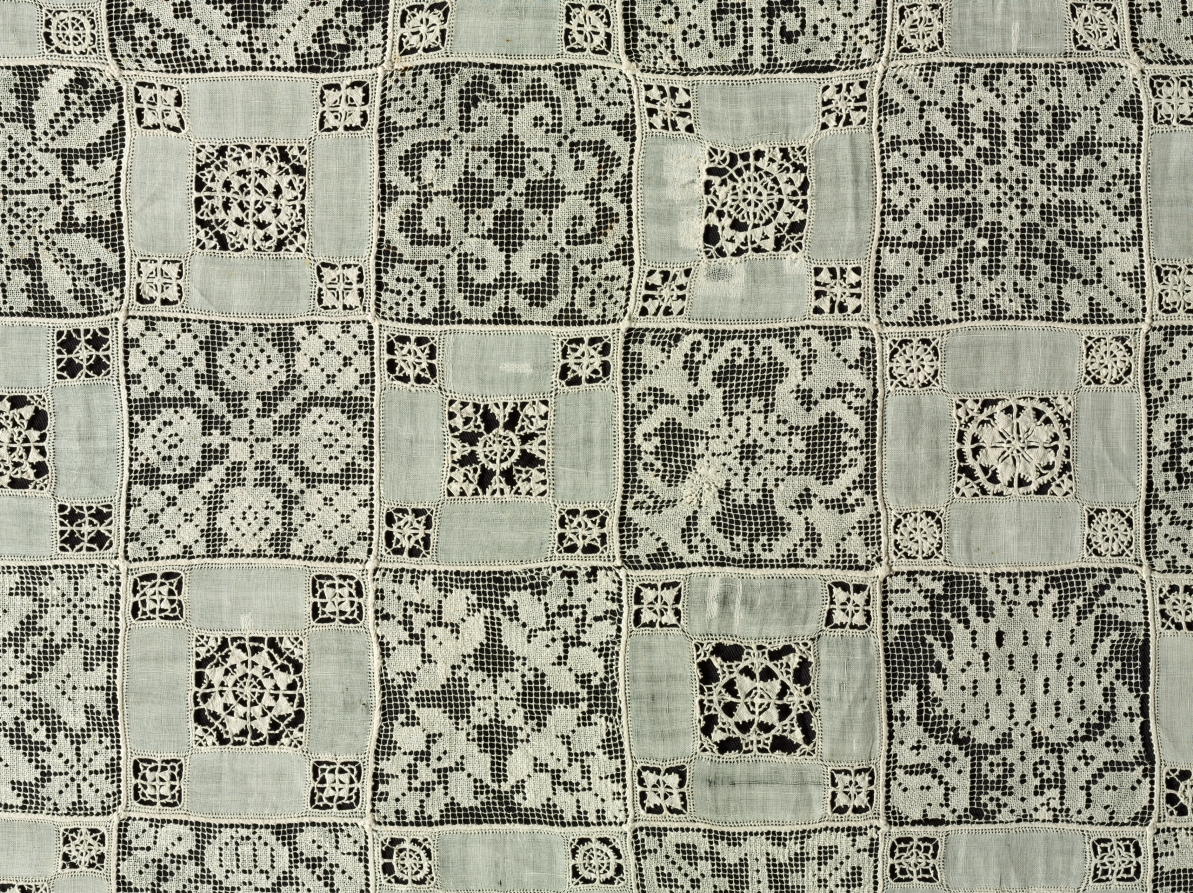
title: Cloth with Floral and Vegetal Patterns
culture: Italy, late 1500s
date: 1560–1600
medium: Bleached linen (est.): needle lace, filet/lacis (knotted ground and darned in two directions), alternating reticella squares (open cutwork), and bobbin lace edging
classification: Lace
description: Textiles often incorporate multiple needlework techniques within a single piece. One of the main techniques in this example of lace is called cutwork. In cutwork, portions of the textile ground, such as a linen or cotton cloth, are cut away and threads are removed to create holes. The edges of the hole are then reinforced with embroidery and a pattern of needle lace can be created within the perimeter. Rather than adding to the cloth to create a design, the craftsperson removes threads to fabricate a pattern.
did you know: The large size and square shape suggest that this textile would likely have been used as a table cloth.